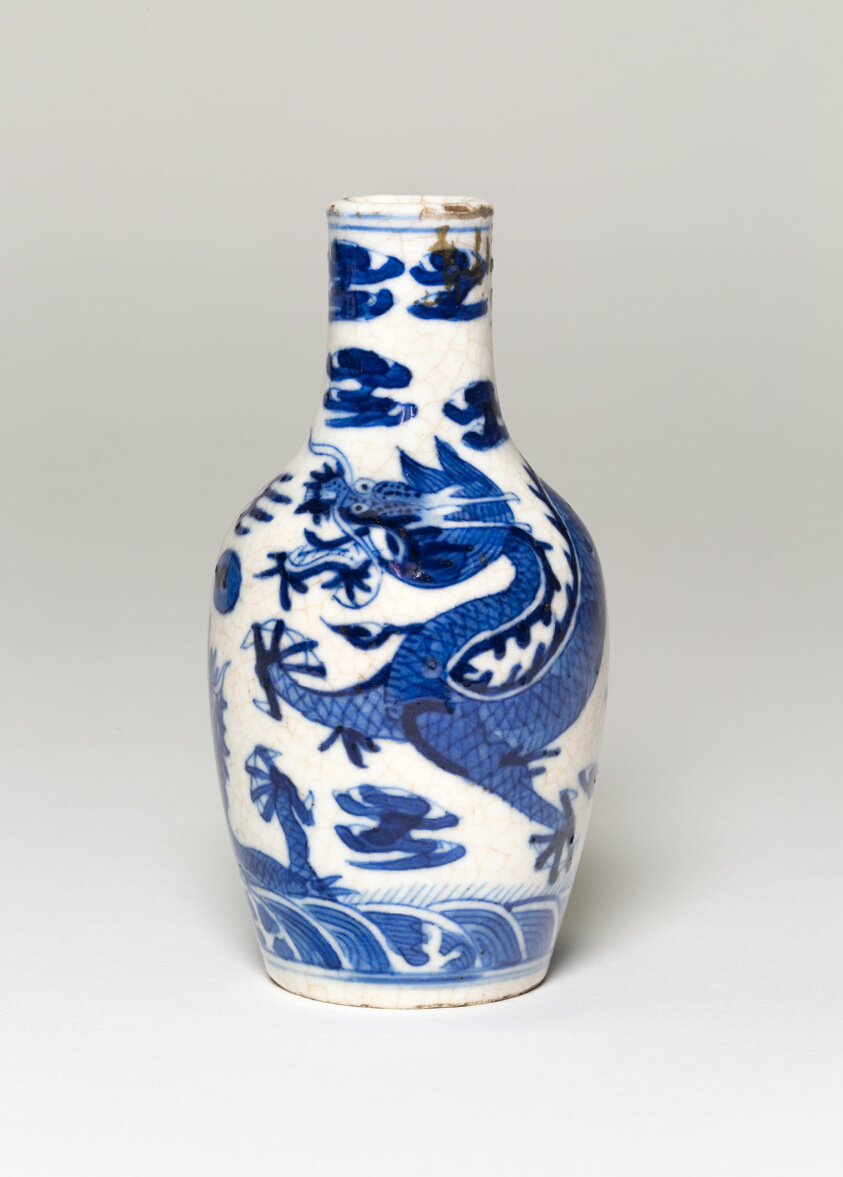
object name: Vessel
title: Miniature Vase with Dragons Chasing Flaming Pearls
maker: China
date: Qing dynasty (1644–1911), Yongzheng reign mark and period (1722–1735)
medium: Stoneware painted in underglaze blue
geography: China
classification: stoneware; asian art; ceramics